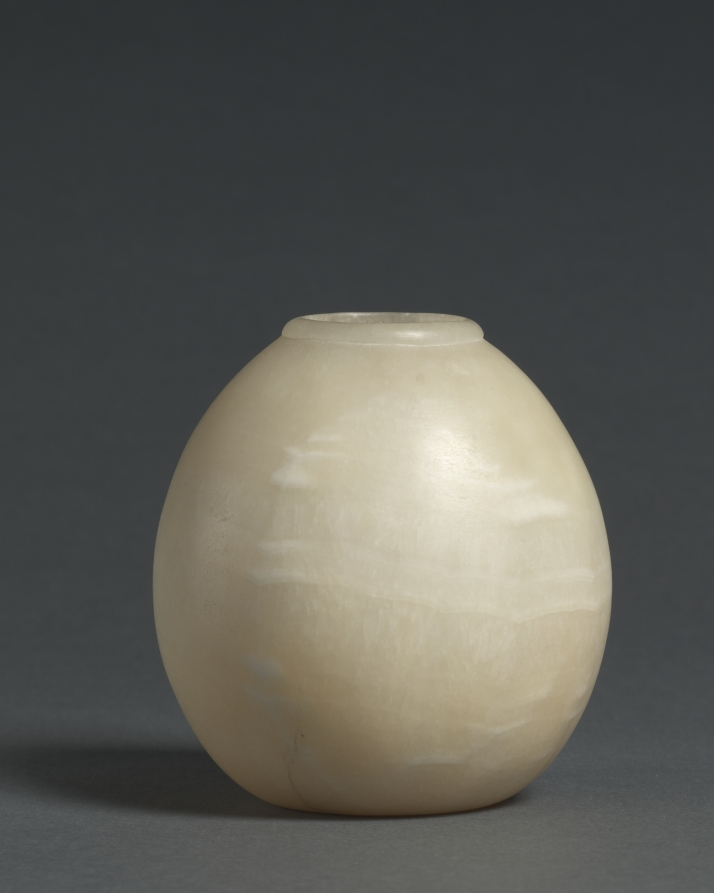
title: Vessel in the Form of an Ostrich Egg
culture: Egypt, New Kingdom (1540–1069 BCE), Dynasty 18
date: c. 1540–1296 BCE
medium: travertine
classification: Vessels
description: Both ancient Egyptian men and women loved cosmetics. Unguents, oils, and perfumes made from aromatic plant resins and gums were obtained at great cost from distant lands. The objects identified with cosmetics were given lavish treatment. Here the fanciful form is an ostrich egg.